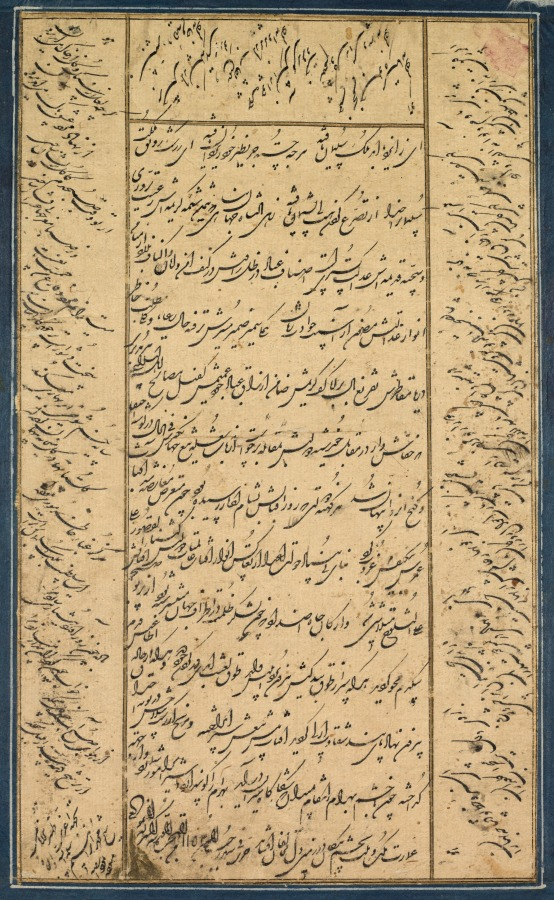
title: Grotesque Dancers Performing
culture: Mughal India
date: c. 1600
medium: gum tempera, ink, and gold on paper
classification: Painting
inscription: Unrelated later Persian text on recto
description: This scene from an unidentified manuscript depicts entertainers at the Mughal court. The dancers appear to be from the fringes of society, and they may be intended to depict tribal people or semihuman nature spirits. One is dark skinned with small elephant ears and red-rimmed eyes, wearing a white tiger-skin pelt. The female dancer wears a collar of leaves; the male figure on the right has horns, wears bells, and carries an animal-headed club that appears to be made of bone. An exuberant orchestra provides musical and vocal accompaniment below. While not an imperial production, this painting may reference the Mughal emperor Akbar’s practice of welcoming a wide range of people from all regions and traditions to his court, since he was interested in understanding their customs.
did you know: Akbar applied an aromatic paste under his arms, which stained his garment.